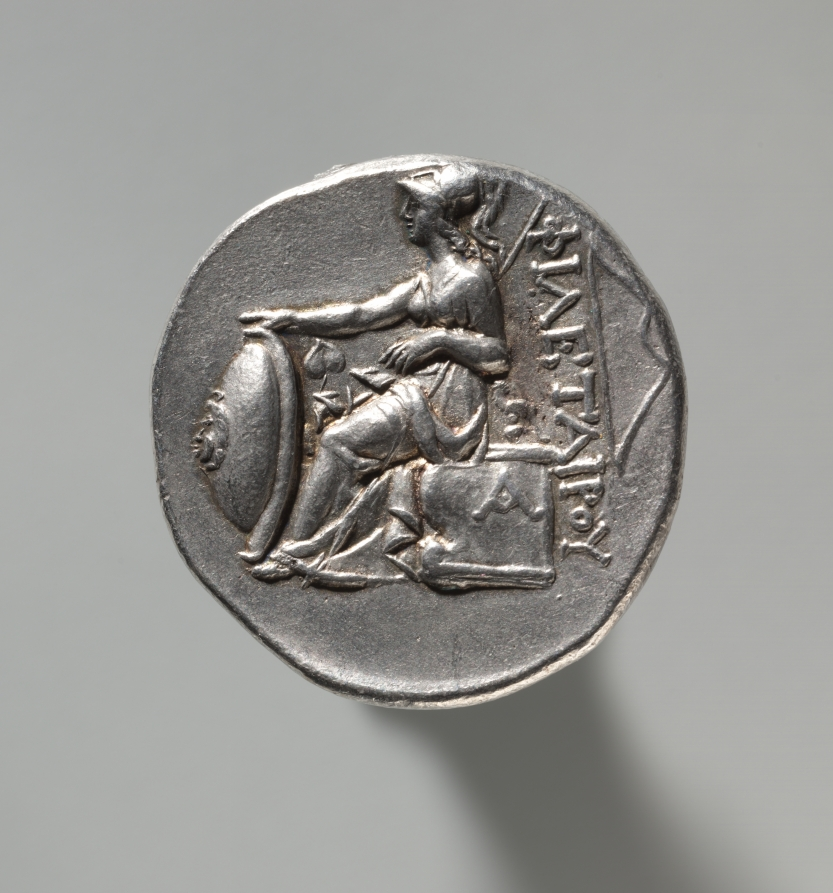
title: Tetradrachm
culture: Anatolia, Kingdom of Pergamum (281–133 BCE), Eumenes I (263–241 BCE)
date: 262–241 BCE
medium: silver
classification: Coins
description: The depictions of rulers found on this coin represents a realistic type of portraiture, similar to that found on coins in the West.